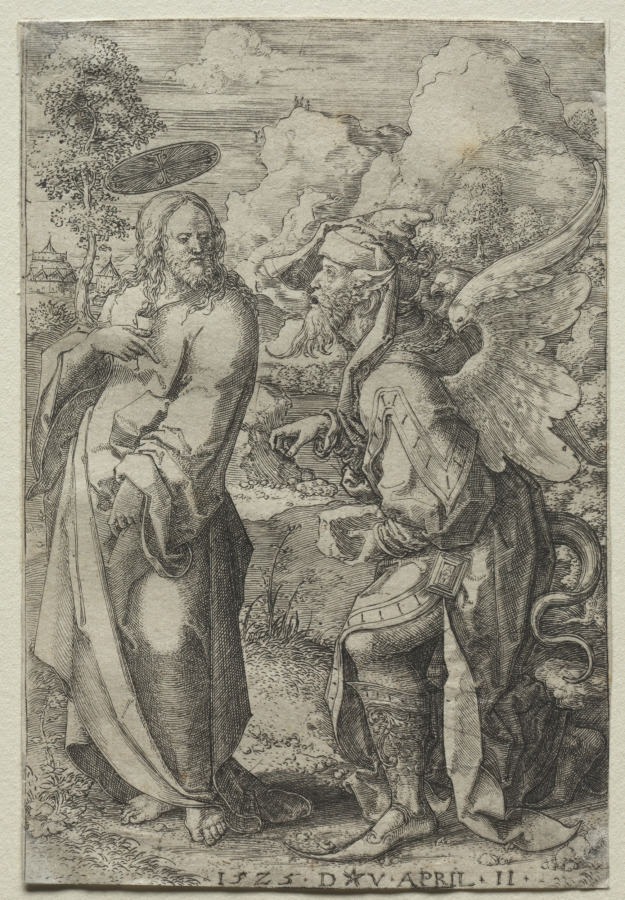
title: Temptation of Christ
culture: Netherlands, South Lowlands, 16th century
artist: Dirk Vellert (Netherlandish, 1480/85–1547)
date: 1525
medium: engraving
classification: Print